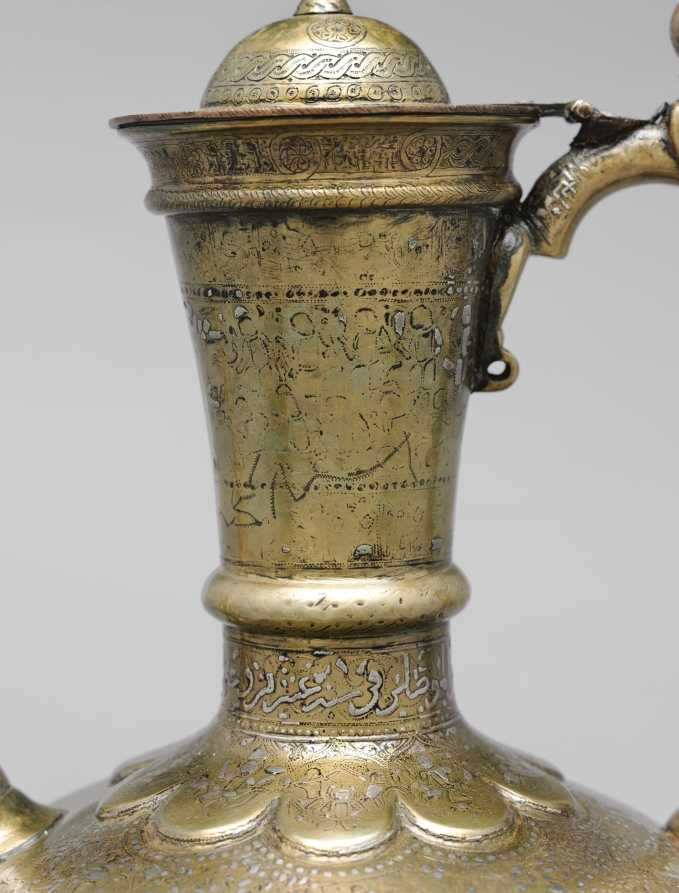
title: Luxury Ewer Extending Good Fortune to the Owner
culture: Iraq, possibly Mosul, Zangid or Artugid Period, 13th Century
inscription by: Ahmad al-Dhaki al-Mawsili (Iraqi, Mosul, active early 1200s?)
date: 1223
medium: brass inlaid with silver; lid and base added later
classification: Metalwork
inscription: Band on the neck (naskh): "Work of Ahmad al-Thaki, the engraver, al-Mawsili, in the year 620 and glory to my owner"; band at the base of the handle (naskh): "Work of Ahmad al-Thaki al-Mawsili"; graffiti of later owners, roughly scratched into the neck of the ewer: "Husayn ibn Qasim"; "Usta al-Muhtasib [?]"; band on the shoulder of the ewer (plaited, animated kufic): "Good luck, and learning, and commanding respect, and prosperity, and pride, and generosity, and faithfulness, and affection, and glory, and survival, and justice, and blessings, and exaltedness, and prosperity, and everlasting peace, and charitable giving."; band on the foot (naskh) [foot is a later addition]; this inscription has not yet been deciphered.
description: This silver inlaid ewer was produced for luxury clientele. The wide band around the body of the vessel displays vignettes of daily and courtly life contained within multilobed medallions. Some of the scenes feature falconry, hunting, dancing, and several groups of musicians. All these scenes are set off against a skillfully executed arabesque background—a pervasive motif in Islamic art characterized by interwoven vegetal and curvilinear elements. An inscription around the ewer’s shoulder extends good fortune, prosperity, and peace to the owner. The ewer is dated 1223 and signed by the master craftsman Ahmad al-Dhaki of Mosul.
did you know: Later owners roughly scratched their names into the neck of the ewer.